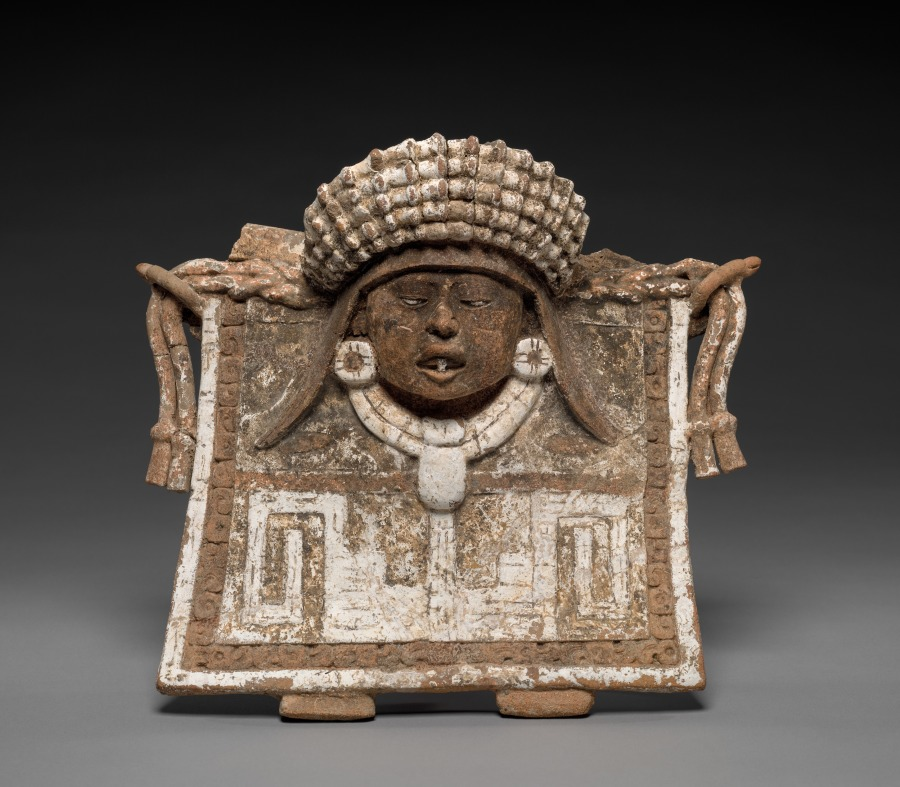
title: Standing Female Figure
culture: Mesoamerica, Veracruz, Nopiloa style?, 7th-10th century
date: 600–1000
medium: ceramic, pigment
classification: Sculpture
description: Ancient Veracruz artists used ceramic to create figural sculptures in a range of sizes, styles, and types. This beautiful, finely wrought female figure is an exceptional example. Although her identity is unknown, her adornments signal high status: ear ornaments, a large necklace, an elaborate dress that drapes over her outstretched arms, and perhaps even her front teeth, filed into a T shape, may have symbolic importance. The unfinished back, with a tripod support, suggests that the figure was meant to be seen from the front.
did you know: This lovely female’s body is a flat plaque supported by a tripod at the rear.